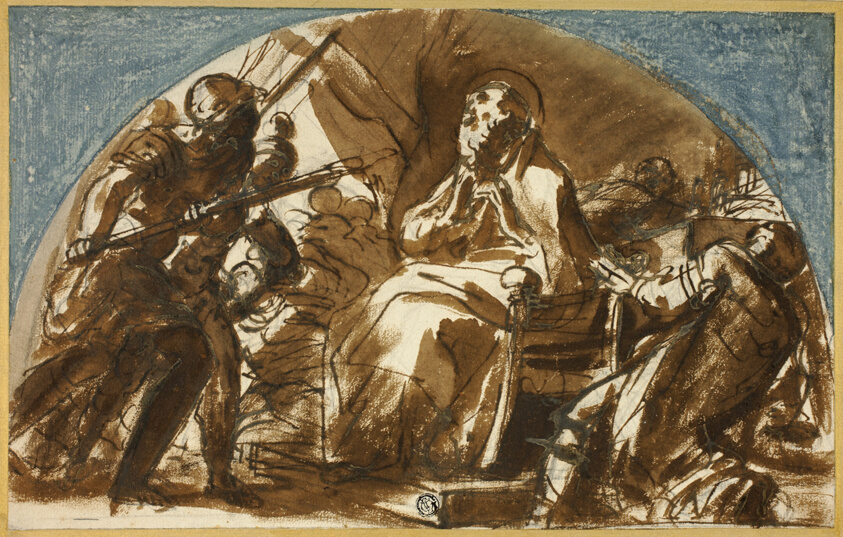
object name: Drawing and Watercolor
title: Martyrdom of a Saint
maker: Attributed to Jacopo Cavedone (Italian, 1577-1660); or Marco Marcola (Italian, c. 1740-1793); or Luca Giordano (Italian, 1632-1705); or a follower of Baldassare Franceschini (Italian, 1611-1689)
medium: Pen and brown ink with brush and brown wash, and blue gouache, heightened with beige gouache, over black chalk, on ivory laid paper, laid down on ivory laid paper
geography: Italy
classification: drawings (visual works); prints and drawing